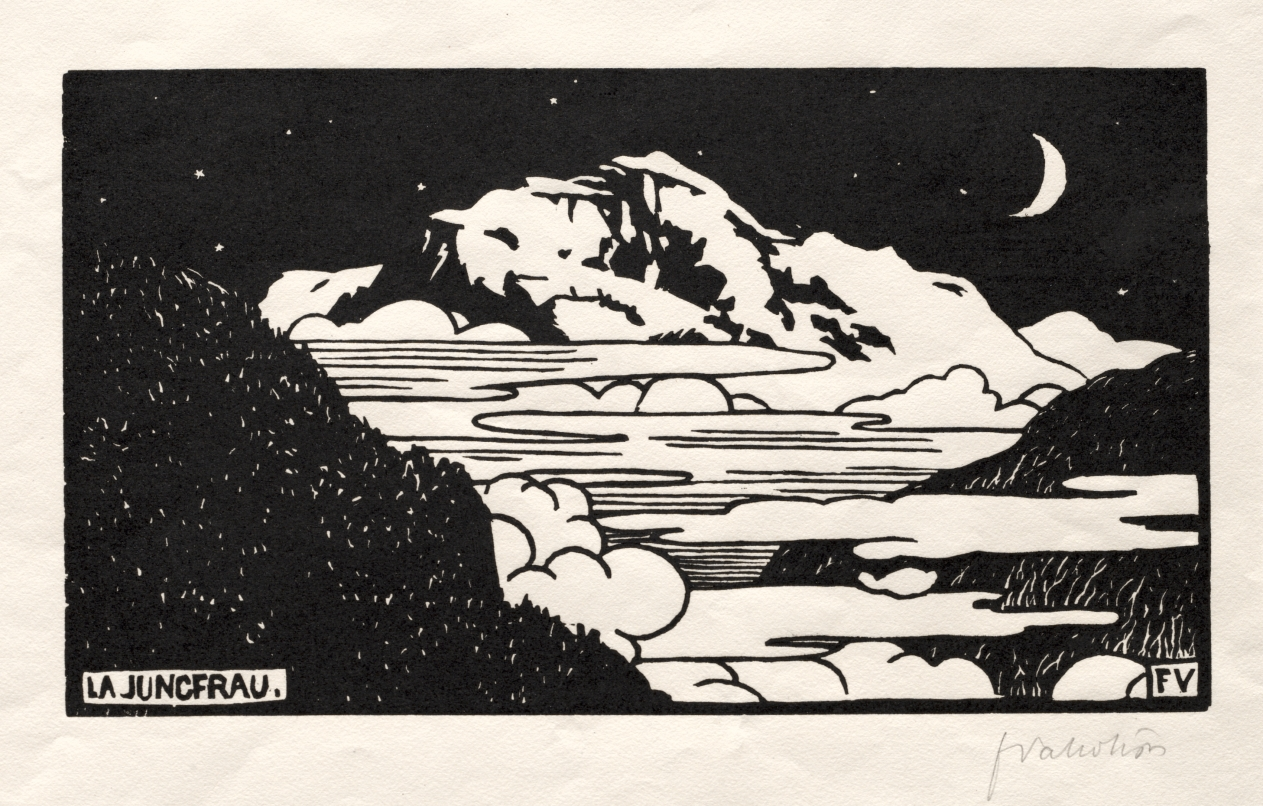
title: The Jungfrau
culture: France, 19th century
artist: Félix Vallotton (Swiss French, 1865–1925)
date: 1892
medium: woodcut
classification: Print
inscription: signed, lower right in graphite: f Valloton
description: Vallotton’s style was based upon the stark contrast between black and white. In executing this view of the Jungfrau mountain in the Swiss Alps, he relied on the tight precision of his technique to convey the drama and mystery of the mountains. Although done by a Nabis artist at the close of the 19th century, this image harks back to the Romantic landscapes of the beginning of the century, in which wonders of the natural world, such as mountains, waterfalls, and volcanoes, were rendered as sublime and fearsome. Vallotton’s aim, however, was more decorative than sublime.